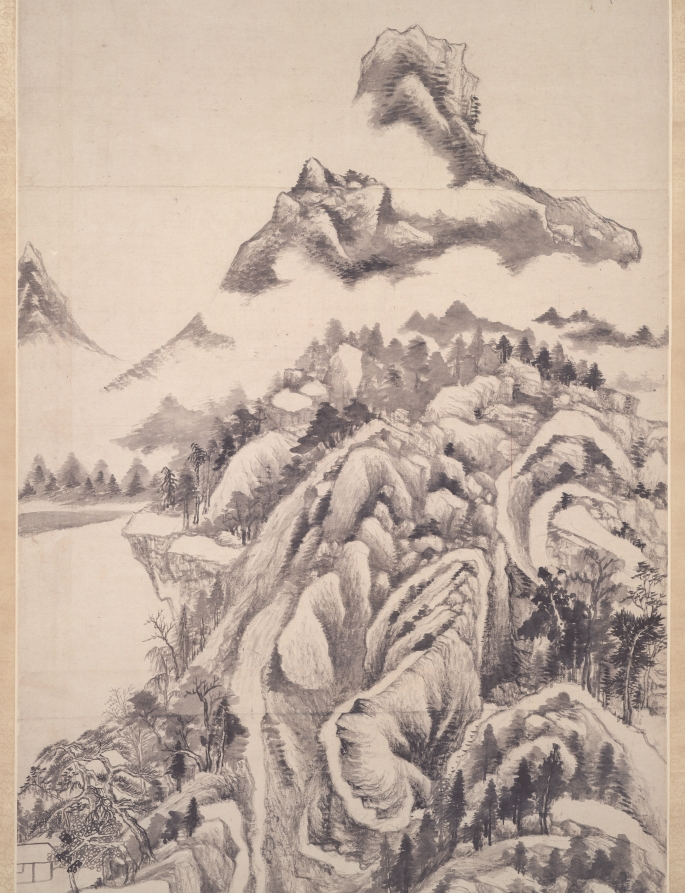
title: Mt. Qingbian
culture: China, Ming dynasty (1368–1644)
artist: Dong Qichang (Chinese, 1555–1636)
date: 1617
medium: hanging scroll, ink on paper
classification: Painting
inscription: Artist's first inscription, signature, and 2 seals: A painting of the Qingbian Mountains in the manner of Beiyuan [Dong Yuan]. In the summer of the dingsi year [1617], on the last day of the fifth month, [I] send this to my senior, Zhang Shenqi. Dong Xuanzai [seals] Zhi zhi hao ri jiang guan 知制誥日講官; Dong Qichang yin 董其昌印.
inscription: Artist's second inscription and signature: Piling irons for ten thousand feet guard the purple sky;/ Where puppies are seen on top of clouds, villages and marketplaces lie./ In the splendor of autumn, where is the most worthy spot to spend the day?/ Amid the rustling sounds of mountain streams, with a volume in hand, meditating on the Way [Dao]. Inscribed by Qichang. (trans. WKH/LYSL)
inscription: 4 additional seals: 3 of Li Enqing 李恩慶 (jinshi of 1833); 1 of Weng Wan-go 翁萬戈 (b. 1918).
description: Dong Qichang radically transforms the landscape composition into a purely abstract design. He organizes the mountain forms to achieve an overall sense of structure, activating the flow of energy (qi) and the momentum of force (shi) throughout the pictorial design. In his art, brush and ink assume life independent of the depicted forms, so that the painting can be appreciated for “the sheer marvels of brush and ink.”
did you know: Dong Qichang had visited the Bian Mountains, which are part of a low range located not far from Wuxing and Lake Tai in the southern province of Zhejiang.